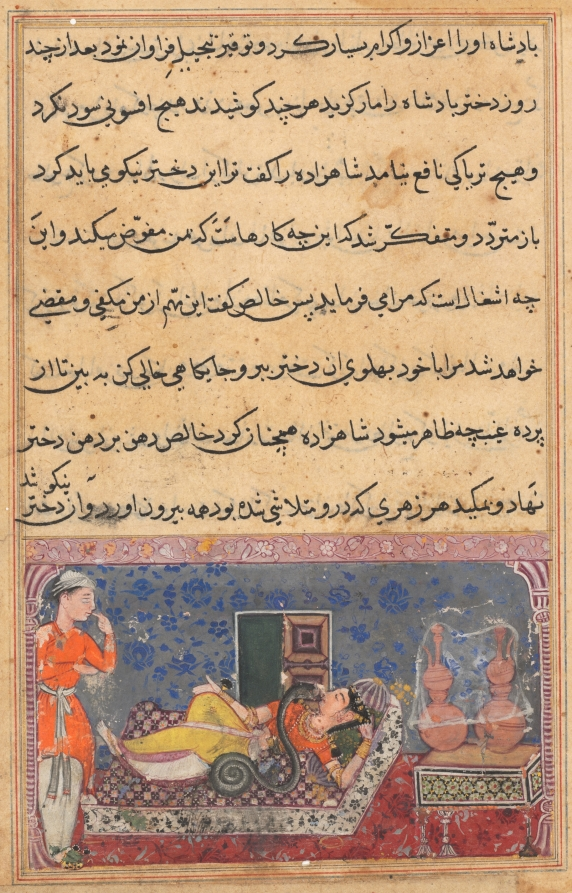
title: Khalis repays the prince for his kindness by changing into a snake and sucking the poison from the king’s daughter, from a Tuti-nama (Tales of a Parrot): Eighteenth Night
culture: Mughal India, court of Akbar (reigned 1556–1605)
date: c. 1560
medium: gum tempera, ink, and gold on paper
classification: Painting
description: The prince looks on in amazement as his snake companion resumes his original form and saves the life of the princess, who was dying from a poisonous snake bite. The snake owed the prince a favor, since the prince had cut a piece of his own flesh to feed him and his mate. After the girl was restored to health, the prince married her and became viceroy to the king. His three companions, Good Fortune, the snake, and the frog, having fulfilled their obligation, then bid him farewell.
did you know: The prince later marries the king’s daughter and becomes a viceroy.